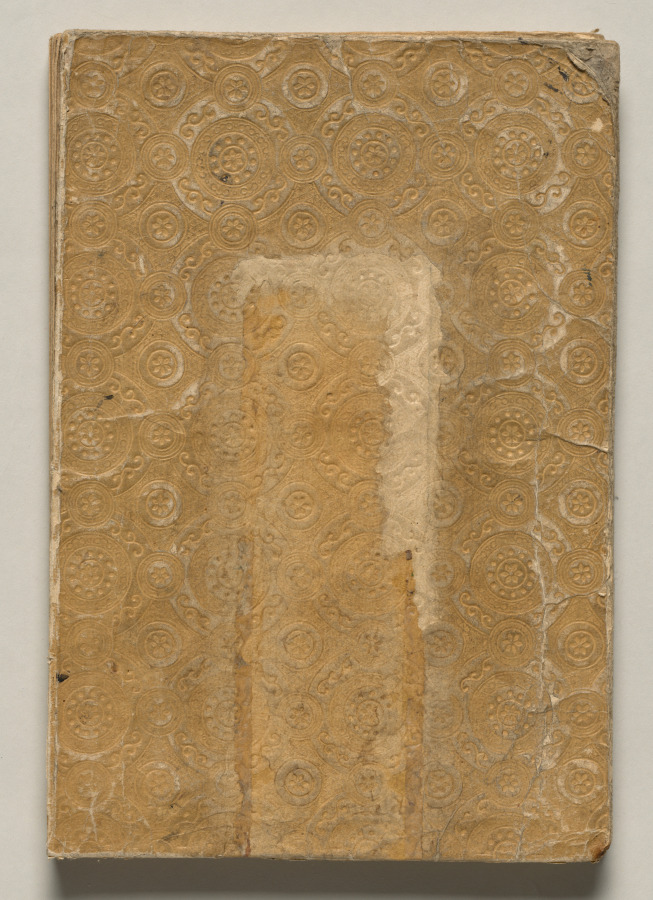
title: Ōkyo Picture Book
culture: Japan, Edo period (1615–1868)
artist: after Maruyama Ōkyo (Japanese, 1733–1795)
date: 1850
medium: accordion-style woodblock printed folding-book; ink and color on paper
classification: Bound Volume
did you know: This impression of a book of woodblock-printed designs is missing a spread that depicts a crane.